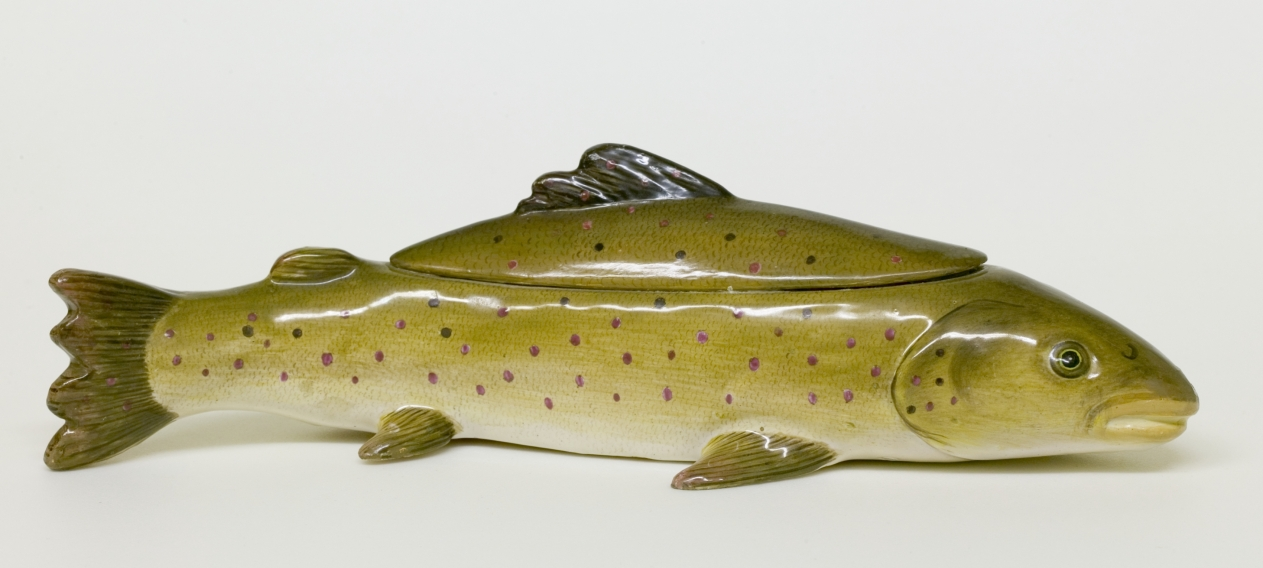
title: Box in the Form of a Fish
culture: France, Niderviller, 18th century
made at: Niderviller Factory (French)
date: 1767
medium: ceramic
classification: Ceramic